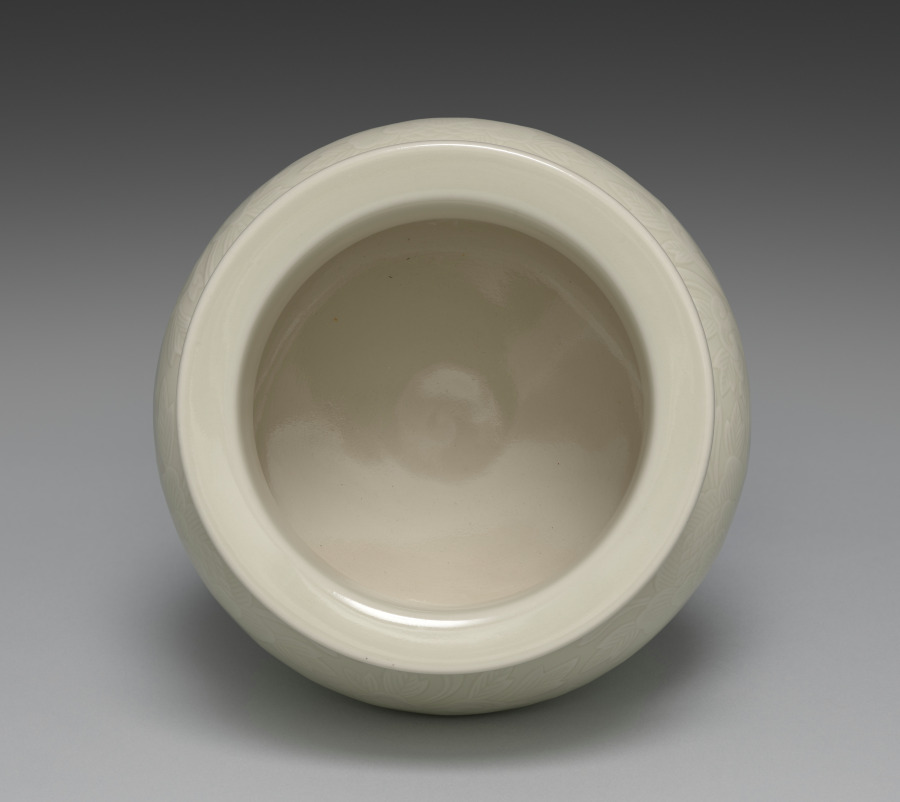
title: Incense Burner with Peony and Cloud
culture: Japan, Meiji period (1868–1912)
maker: Seifū Yohei III (Japanese, 1851–1914)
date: 1914–46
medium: Porcelain with molded and incised design, pale pink glaze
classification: Ceramic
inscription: 清風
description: Yohei IV’s incense burner has a scrolling floral pattern of peonies and nyoi staff-head forms around the body and a band of clouds around the collar. These are done in low relief, with incised lines marking the details in the flower petals and leaves. The silver lid has a proliferation of flowers, including lily, peony, and a variety of chrysanthemums. The box lid identifies the subtle pink over an ivory body as “dawn’s light[–glazed] porcelain” (shokōji). After he became an Artist of the Imperial Household, Yohei III created a number of glaze and clay combinations with what would have been considered Japan-focused names to be in alignment with his position as an artist representing the nation. Among them was a glaze called “dawn’s light pale [pink] color” (akebonoiro tansai), which he invented in 1895. It is possible that this incense burner is an example with this glaze, despite the slightly different name given on the box. While the name alludes to the Land of the Rising Sun, an epithet for Japan, the burner’s motifs remain very much drawn from the Chinese repertoire.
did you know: Seifū Yohei IV’s incense burner has a pale pink glaze named “dawn’s light.”